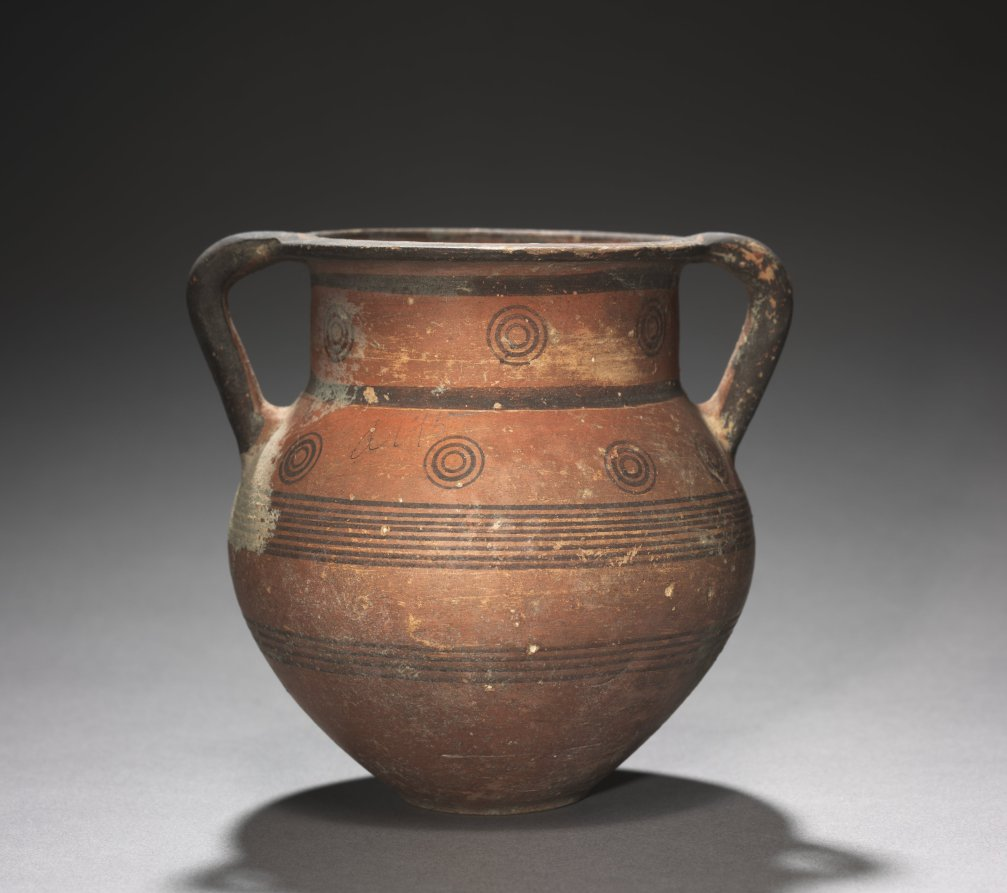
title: Amphora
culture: Cyprus, Cypro-Archaic I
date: c. 750–600 BCE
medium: red ware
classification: Ceramic